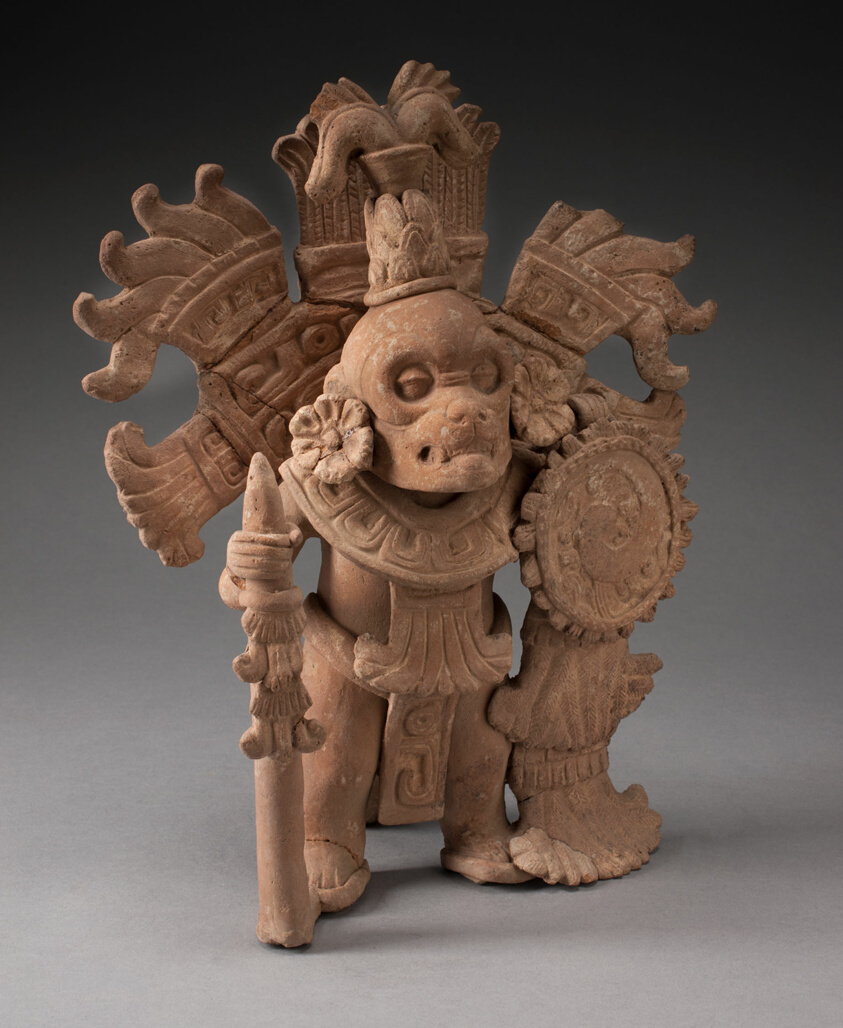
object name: Sculpture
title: Standing Warrior Figure with Removable Mask and Headdress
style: classic veracruz, Arts of the Americas, veracruz, mesoamerican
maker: Classic Veracruz; Veracruz, Mexico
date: 700–1000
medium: Ceramic and pigment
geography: Veracruz state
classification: sculpture; ceramics; masks; art of the americas; statue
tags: warriors, warefare, people